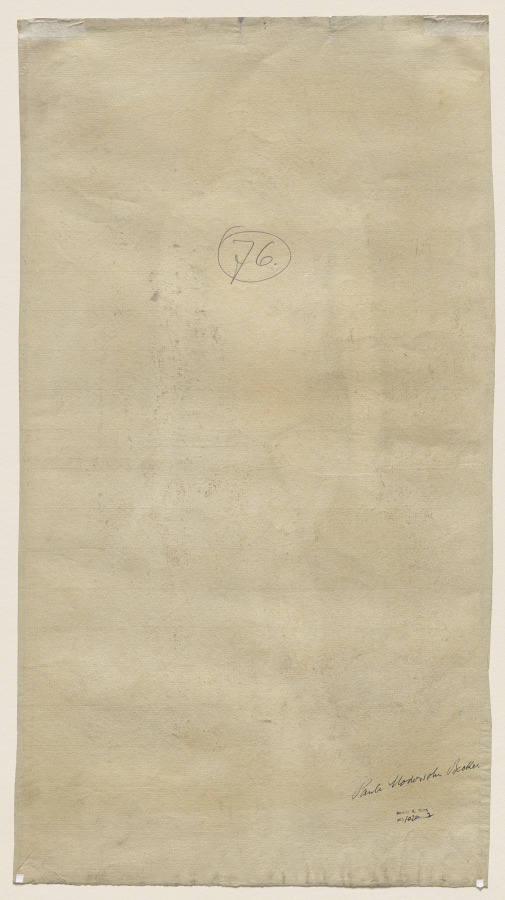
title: Seated Female Nude (Self-Portrait?)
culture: Germany, 19th century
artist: Paula Modersohn-Becker (German, 1876–1907)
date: c. 1899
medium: charcoal with stumping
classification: Drawing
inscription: signed, lower left, in black crayon: p.m.b.; verso, sale stamp, lower right, in purple-gray ink: Samml. E. Rump / [pag.?] 102 [underlined] [Nr.?] 2 [underlined] [numerals are written in black ink]; upper center, in graphite: 76 [circled]; lower left, in graphite: 75 [circled, partially erased]; lower right, in black ink: Paula Modersohn Becker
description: Although Paula Modersohn-Becker died in 1907, just as the Expressionist groups in Dresden and Munich were forming, the themes of her work prefigure the movement. This likely self-portrait exhibits her desire to convey not the idealized appearance of the female body but rather its fundamental essence, stripped of all the world’s trappings. She distilled the human body into flattened forms—achieved by erasing and blending the charcoal—and abbreviated the delineation of the feet, hands, and face. The sitter’s piercing stare invites the viewer to move beyond the body as flesh and blood toward her emotional or spiritual state.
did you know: Paula Modersohn-Becker's career was extremely brief but prolific before dying from complications of childbirth at age 31.